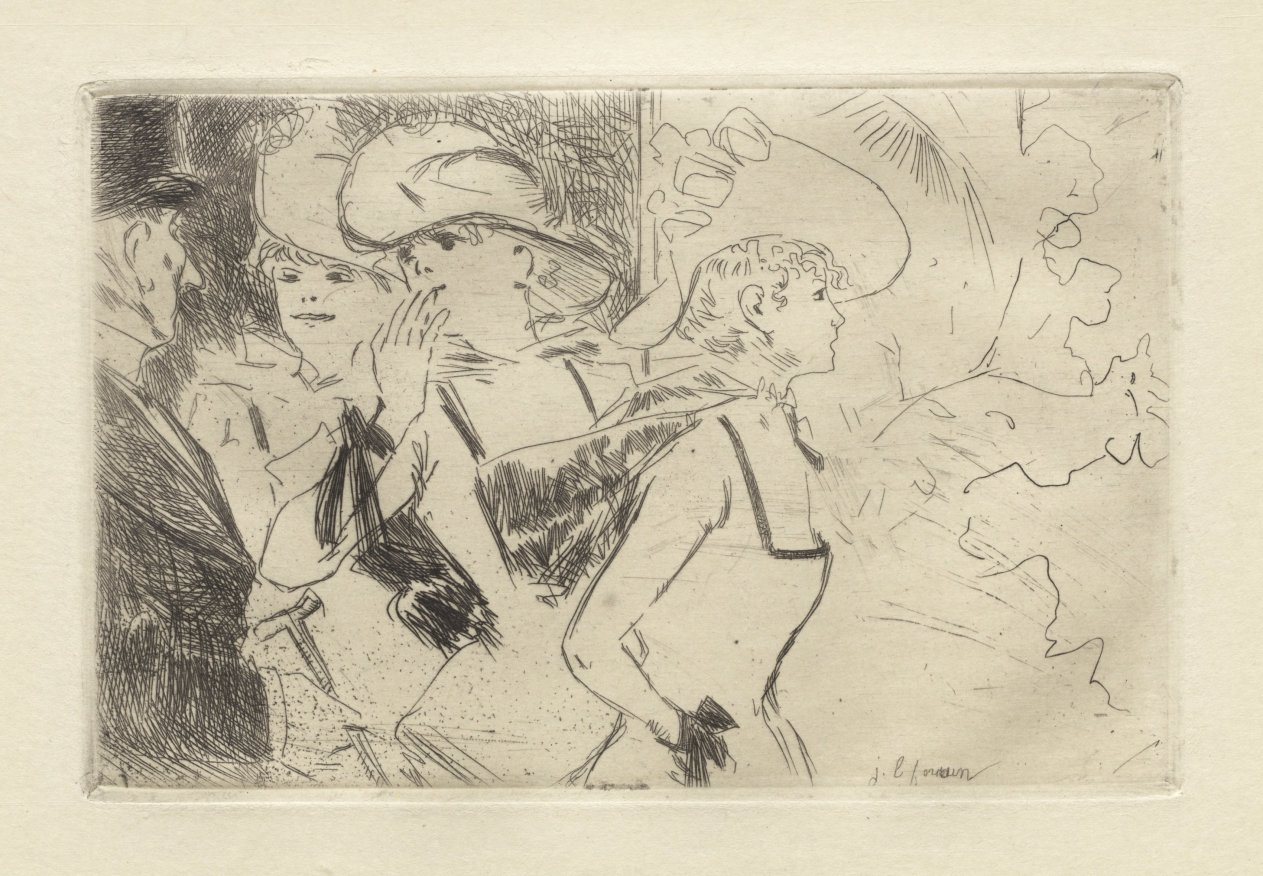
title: The Folies-Bergère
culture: France, 19th century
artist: Jean Louis Forain (French, 1852–1931)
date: c. 1880–86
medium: etching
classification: Print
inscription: signed lower right in plate: j.l. forain